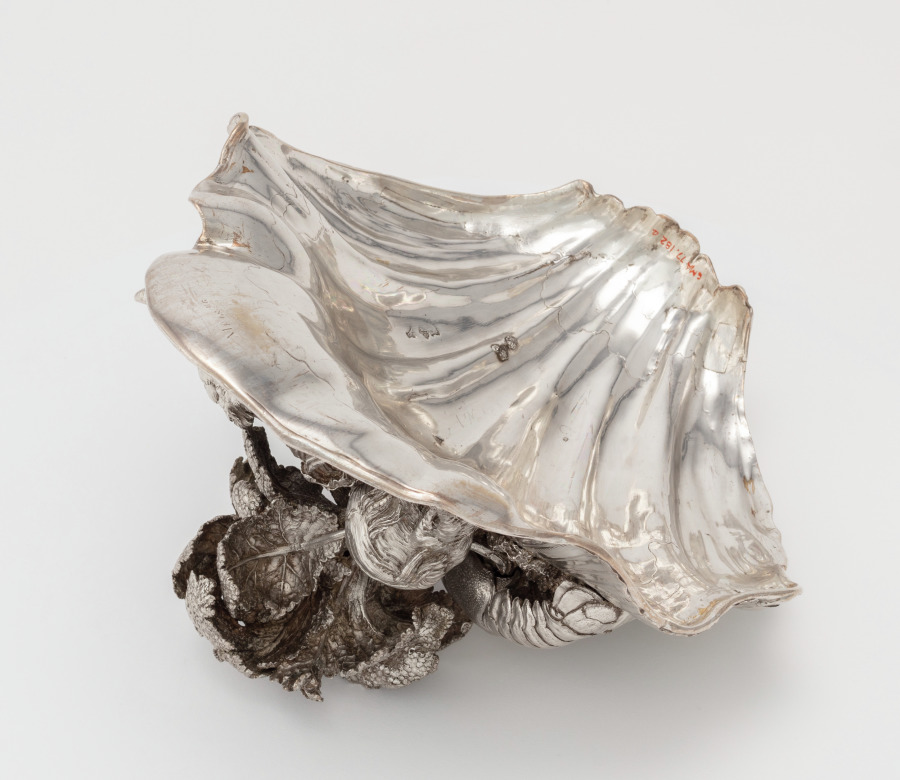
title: Cover for a Tureen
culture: France, Paris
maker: Henry Adnet (French, 1745)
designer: Juste-Aurèle Meissonnier (French, 1695–1750)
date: 1735–38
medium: silver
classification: Silver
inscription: engraved Meissonnier signature.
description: See entry for cover record 1977.182.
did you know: The langoustine, pigeon, and vegetables were cast using real examples giving the silver copies lifelike detail and appearance.